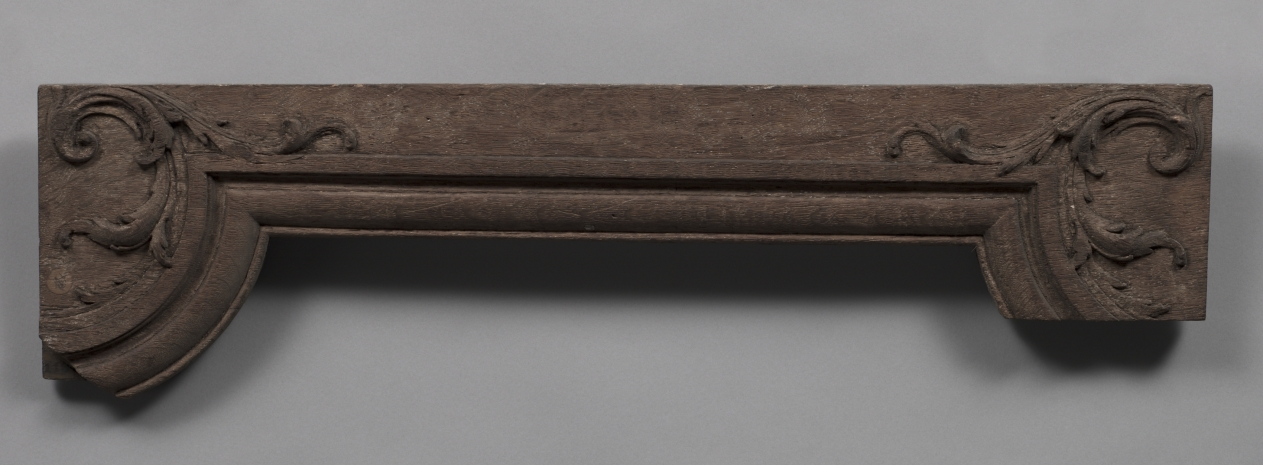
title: Panel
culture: France, Regency Period, 18th Century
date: 1715–1723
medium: wood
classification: Furniture and woodwork